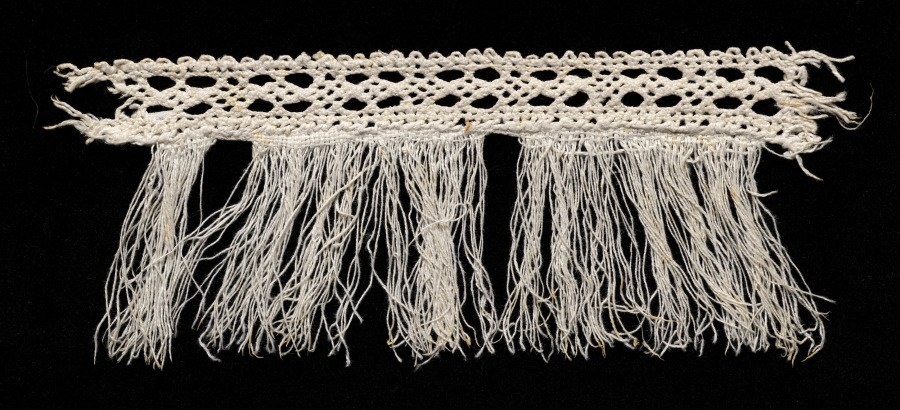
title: Lace Insertion with Fringe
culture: Italy, Venice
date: 1540–60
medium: Linen: bobbin lace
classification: Lace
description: Although this fringed bobbin lace fragment is made of linen, its format is like those for laces made of gold, silver, and colored silk threads.